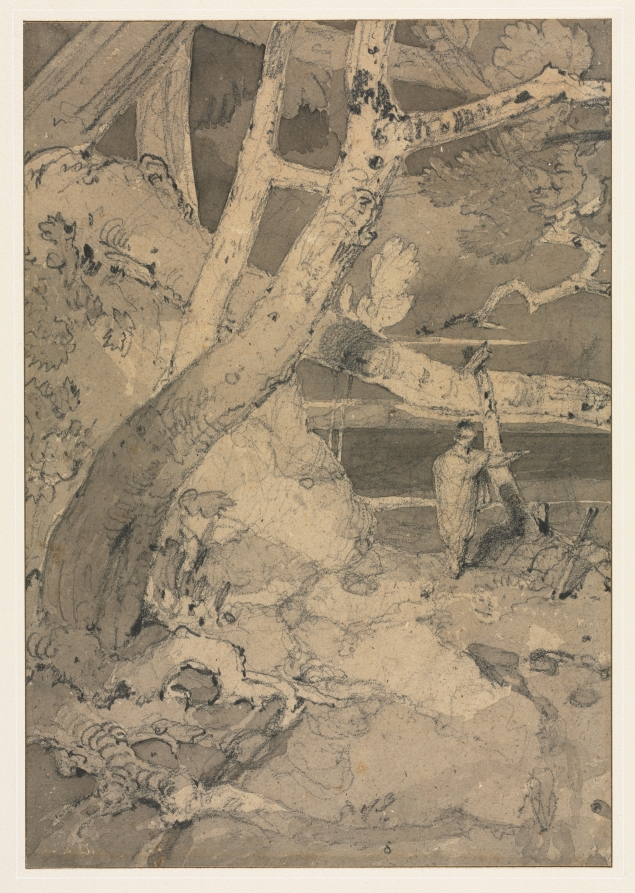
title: Traveler in a Woodland Landscape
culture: England, 19th century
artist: John Sell Cotman (British, 1782–1842)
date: 1806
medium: graphite and gray wash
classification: Drawing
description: John Sell Cotman left his native Norfolk at the young age of 16 and traveled to London with the aspiration to be an artist. His work evolved at a rapid pace as he developed a highly original style remarkable for its simple elegance and schematic treatment of the natural world. This landscape was made soon after a trip to Yorkshire. Cotman largely ignored the noteworthy landmarks of the area, preferring obscure views—trees, crumbling stone walls, and dilapidated fences. Inspired by the Greta woods, the straining bows of the trees form a beautifully balanced structure of geometric and amorphous shapes.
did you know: This drawing is closely related to one in the collection of the Norwich Castle Museum, in which a similarly abstracted figure retreats beneath embowering trees twisted in fantastic shapes.